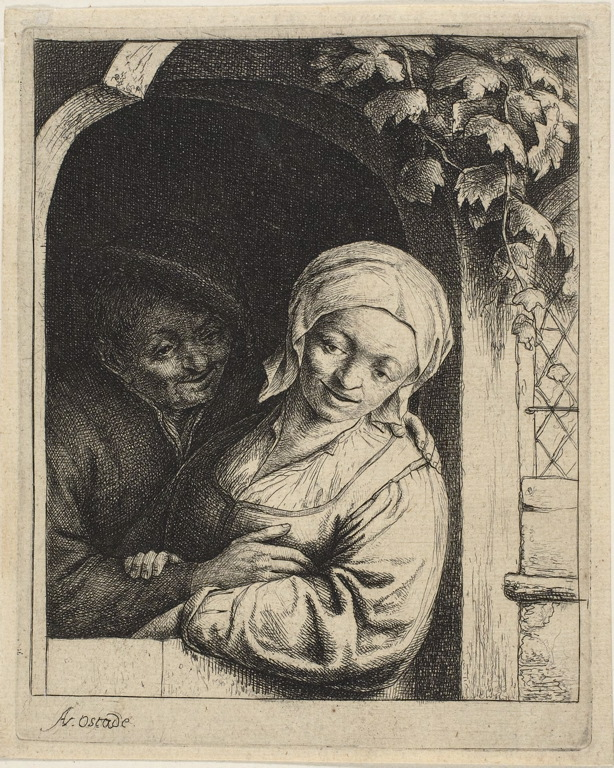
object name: Print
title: Village Romance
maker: Adriaen van Ostade (Dutch, 1610-1685)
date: c. 1652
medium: Etching in black on cream laid paper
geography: Holland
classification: print; prints and drawing